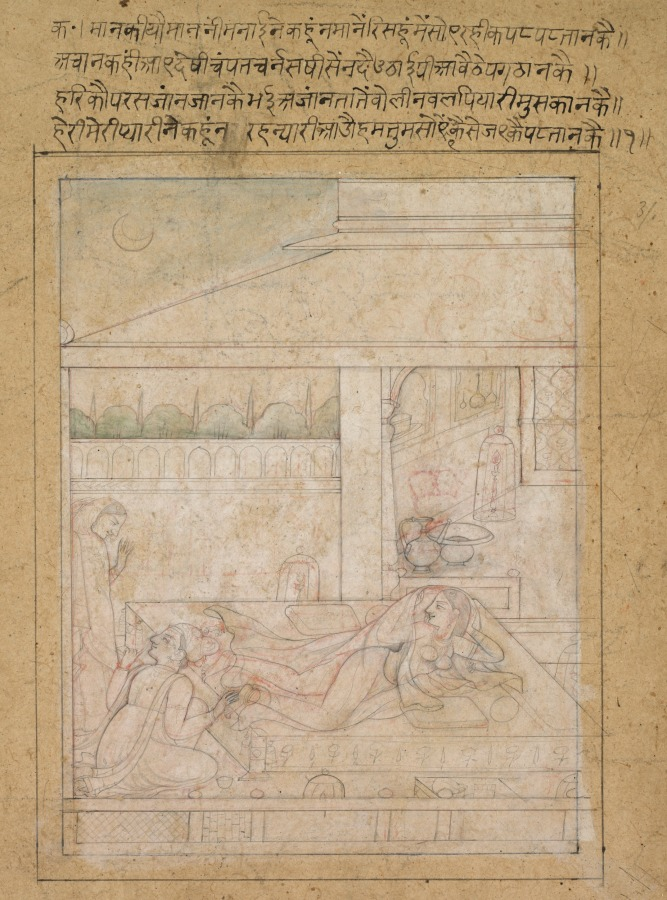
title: Radha and Krishna's reconciliation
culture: Northern India, Pahari kingdoms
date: c. 1790–1800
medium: Gum tempera and ink on paper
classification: Painting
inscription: 'Angry was the Manini, and not the least appeased by any prayers, she lay asleep in wrath and drew the sheet above her head for spite; Then all of a sudden and softly treading came her sakhi on the scene; and sending a message with his eyes, her lover rose and sat at her feet. Albeit she knew full well it was Hari's (Krishna's) touch, she made as if she knew it not; the newly-beloved spoke to him with a smile--- "O my dear friend, stay not apart, but come, let you and I on one bed sleep, and spread on sheet (above us)." Inscription above top border: "The stubborn heroine, wrathful and recalcitrant, drew the sheet over her head feigning sleep. As her sakhi entered, the lover, signalling with his eyes, rose and sat at her feet. Although she knew it, was Hari's touch, the heroine dissembled, saying with a smile: ‘Come, friend [feminine gender], let us sleep on one bed and spread one sheet [over us].'"1 1. Inscription translated in Coomaraswamy, 1916, 1: 48-49.